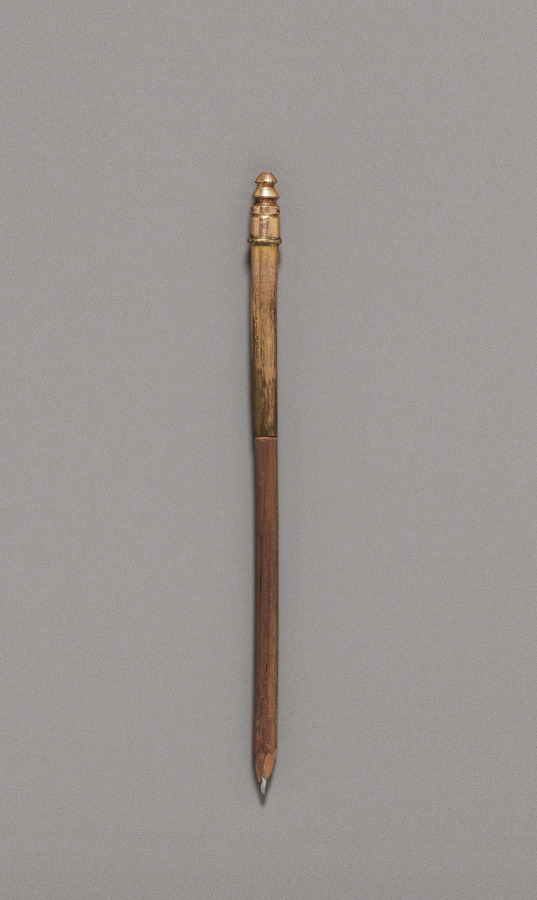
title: Pencil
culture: England, 18th century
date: c. 1770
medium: gilt metal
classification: Miscellaneous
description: Luxurious personal objects were an essential part of a privileged wardrobe during the 1700s and early 1800s, emphasizing their owner’s refinement and wealth. Especially popular were étuis, small ornamented cases containing miniature sewing, writing, or grooming implements that hung at a woman’s waist from an ornate clasp, known as a chatelaine. Despite its glittering surface, this small expensive set disguised a system based on the labor and suffering of enslaved or indentured people, whether in gold and stone mines or the shop where it was made.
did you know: Stored inside this case are grooming and writing instruments such as a clasp knife, scissors, an ivory tablet, a pencil, a threading needle used for lacing corsets, and an ear scoop.